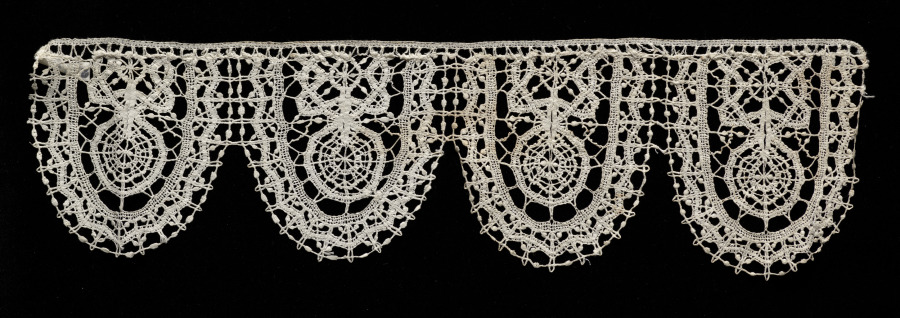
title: Lace Fragment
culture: Italy, Genoa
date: 1600s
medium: Bobbin lace (rose lace) edging of points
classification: Lace